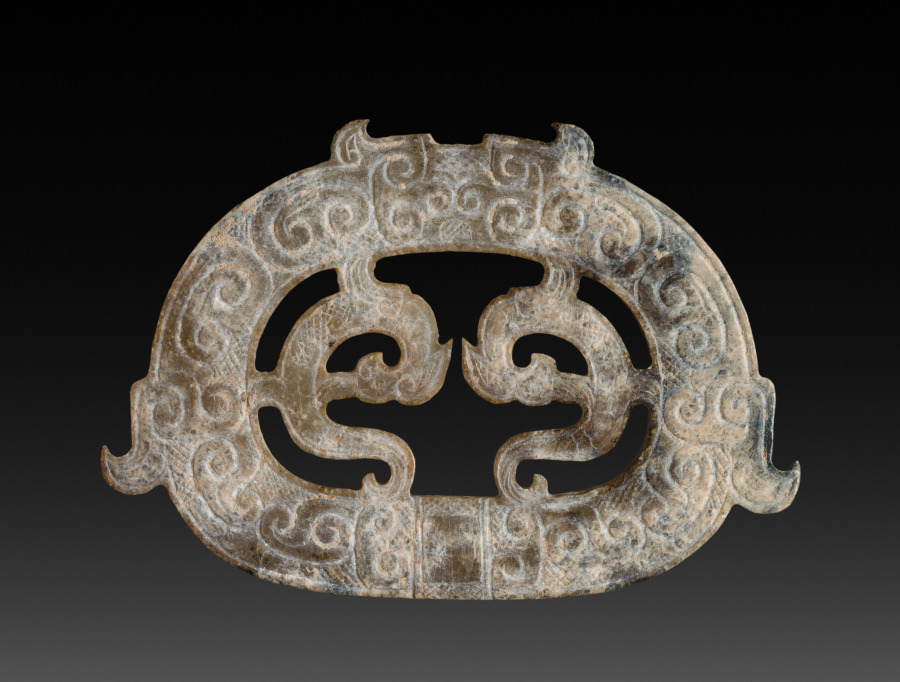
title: Double Dragon Plaque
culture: China, Eastern Zhou dynasty (770–256 BCE), Warring States period (475–221 BCE)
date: 475–221 BCE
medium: nephrite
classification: Jade